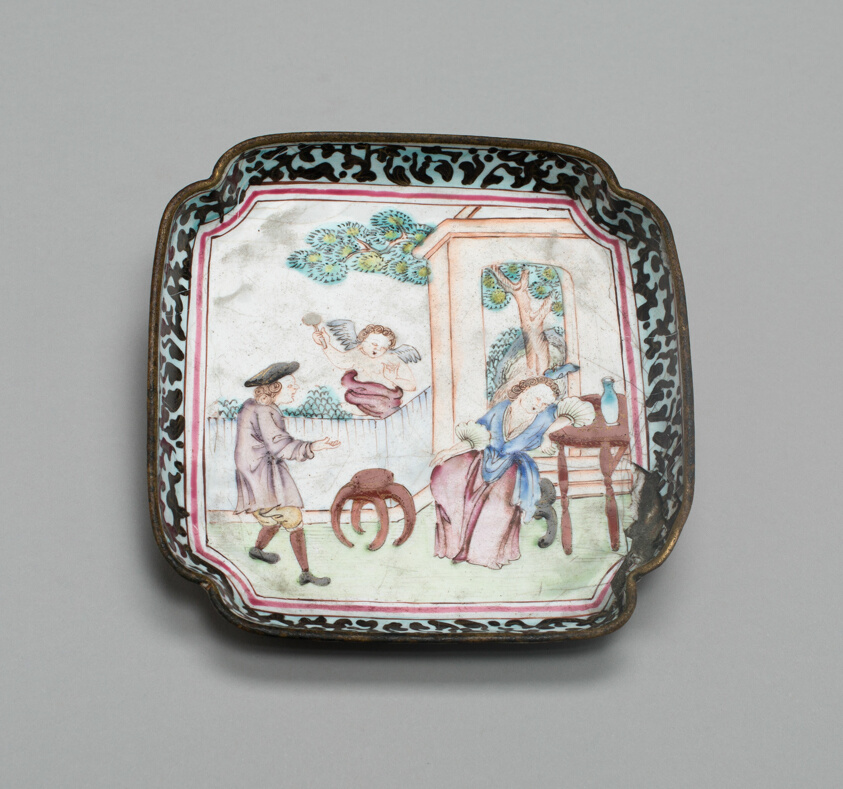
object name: Metalwork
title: Tray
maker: China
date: 1730/70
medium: Polychrome enamel on copper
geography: China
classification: tray; enamel; european decorative arts; metalwork